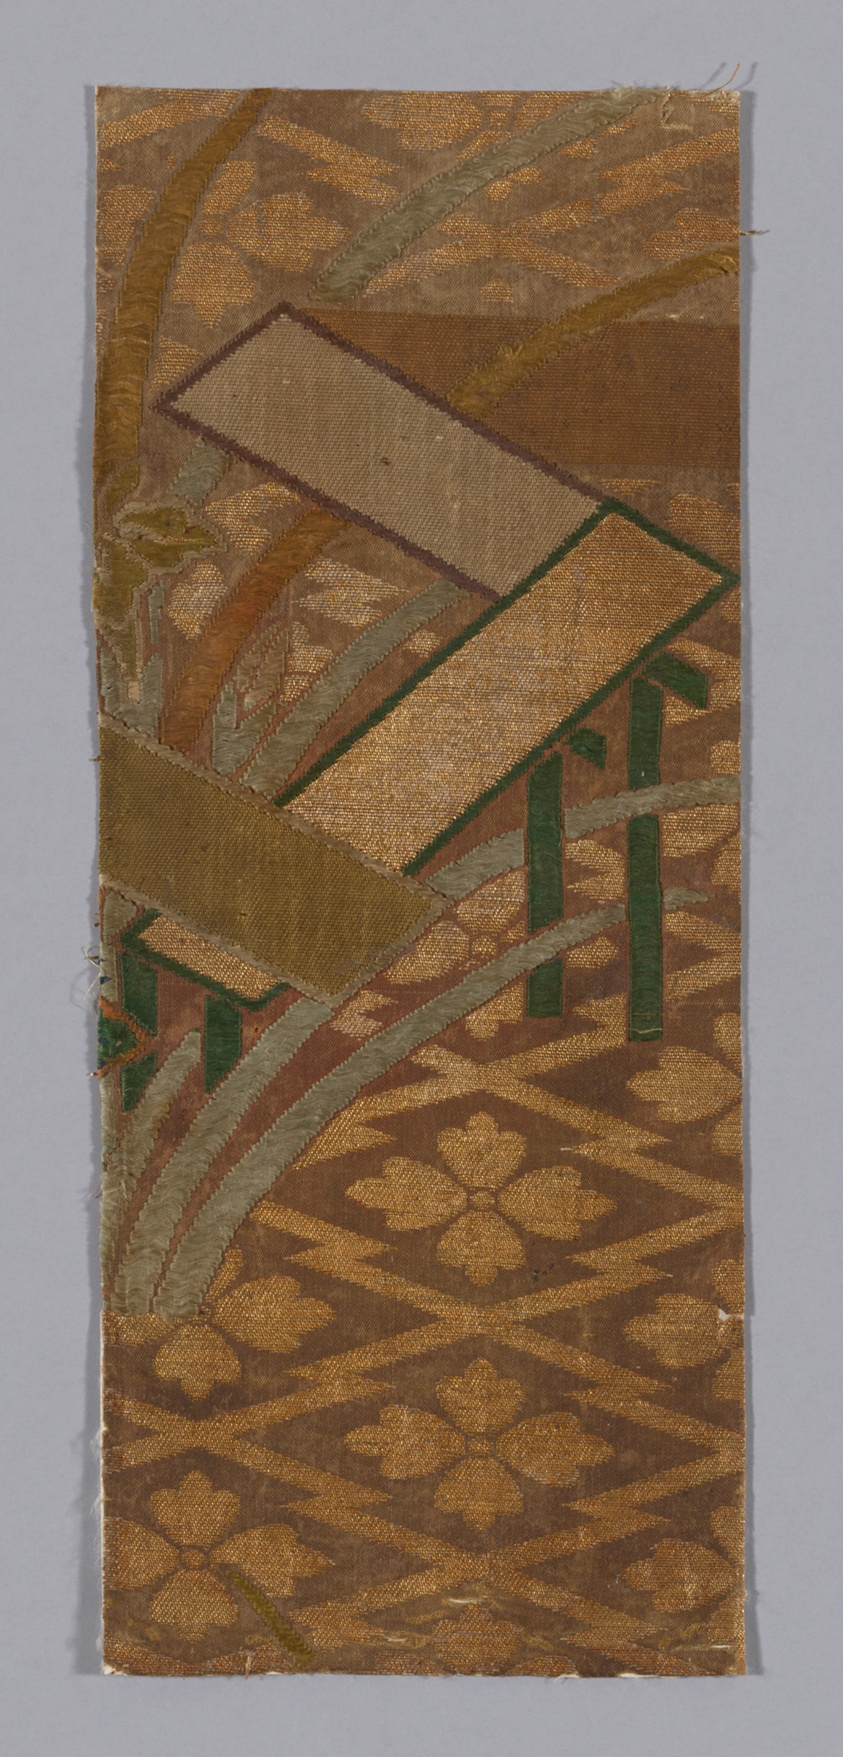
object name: Textile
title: Fragment (from Noh Costume)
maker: Japan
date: Edo period (1615–1868), 1675/1700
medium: Brocaded simple compound twill, silk and gilt paper; 1 1/2 strips to m.m.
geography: Japan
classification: weaving; textile